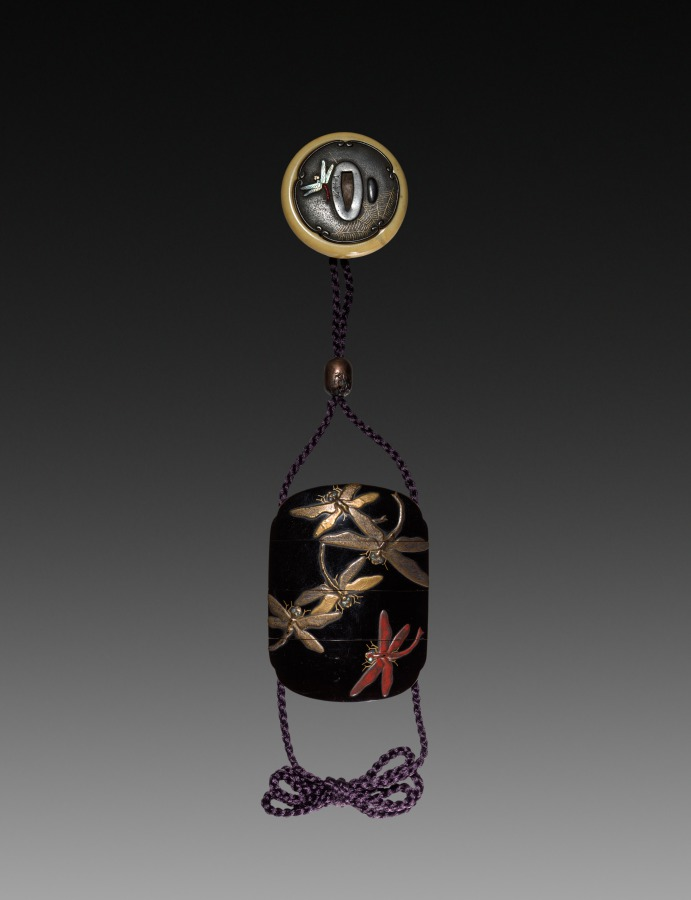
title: Inro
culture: Japan, Edo period (1615–1868)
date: 1615–1868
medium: lacquer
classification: Lacquer